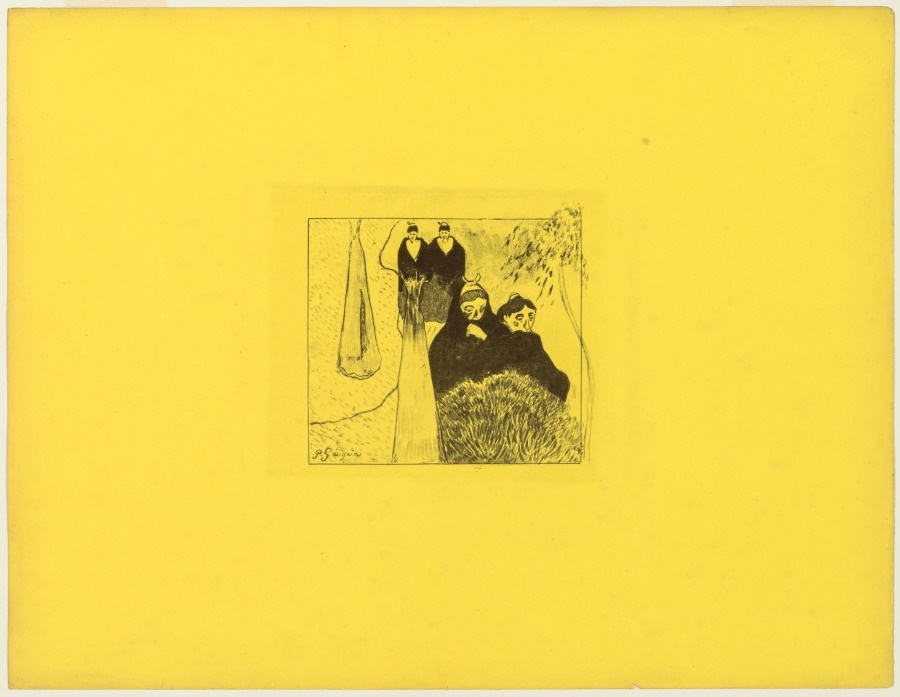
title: Volpini Suite: Old Women of Arles (Les Vieilles Filles [Arles])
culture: France, 19th century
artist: Paul Gauguin (French, 1848–1903)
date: 1889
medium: zincograph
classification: Print